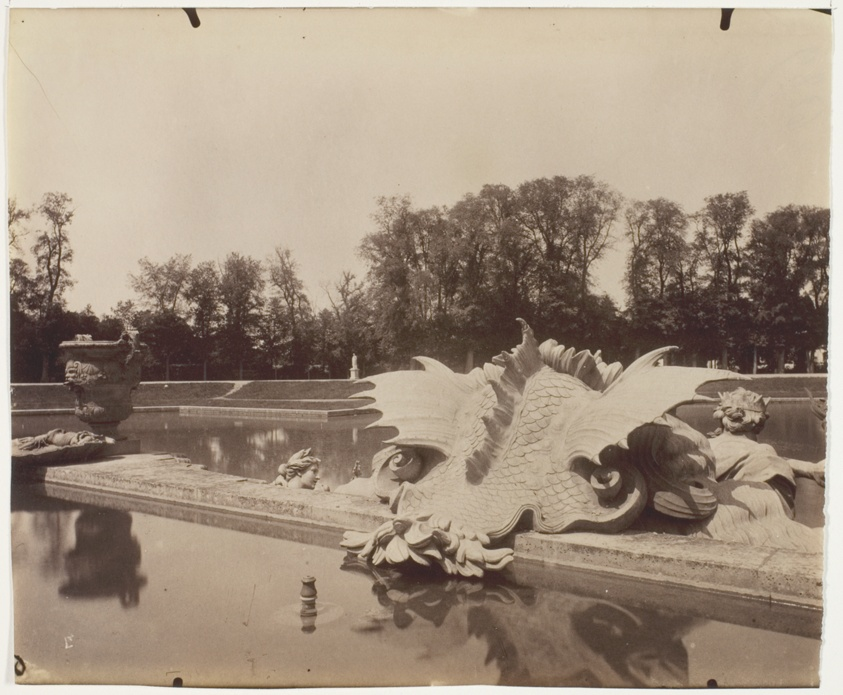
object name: Photograph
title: Versailles, Bassin de Neptune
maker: Jean-Eugène-Auguste Atget (French, 1857–1927)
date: 1902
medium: Albumen print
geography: France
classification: albumen silver print; photographic process; photography; photograph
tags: Collected by Hugh Edwards